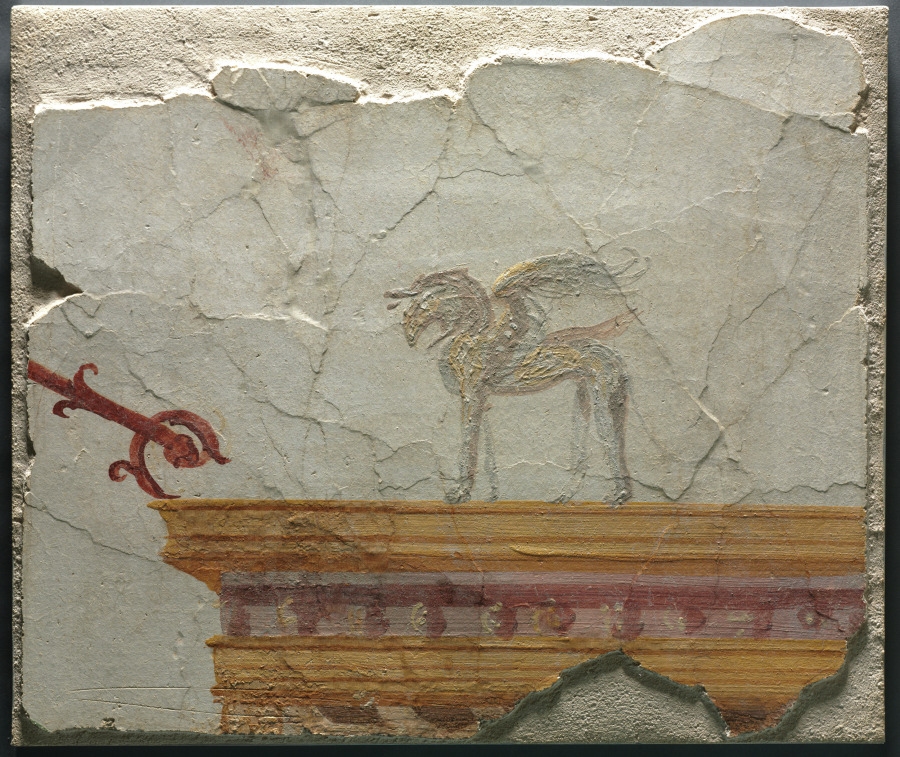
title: Griffin Atop Entablature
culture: Italy, Pompeii, Roman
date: 1–100 CE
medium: fresco fragment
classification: Painting